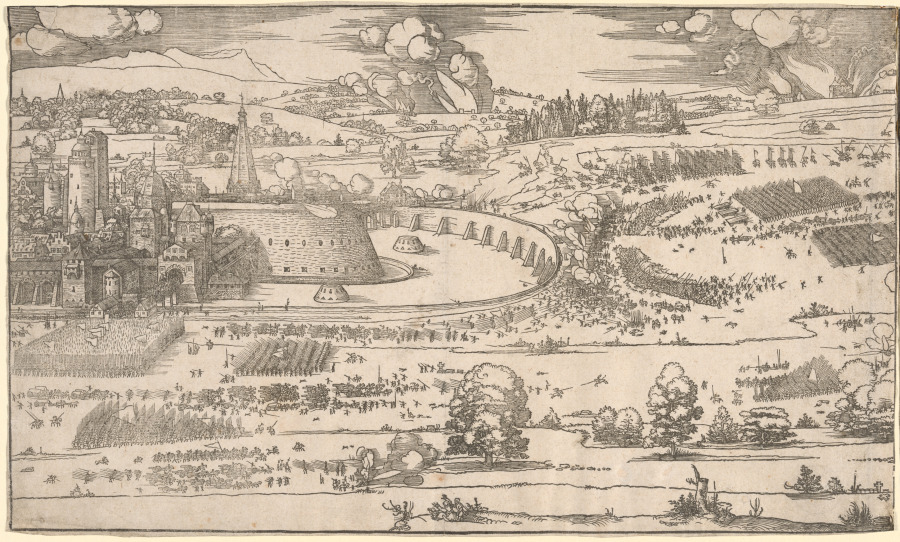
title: Siege of a Fortress: Right Portion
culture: Germany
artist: Albrecht Dürer (German, 1471–1528)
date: 1527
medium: woodcut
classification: Print